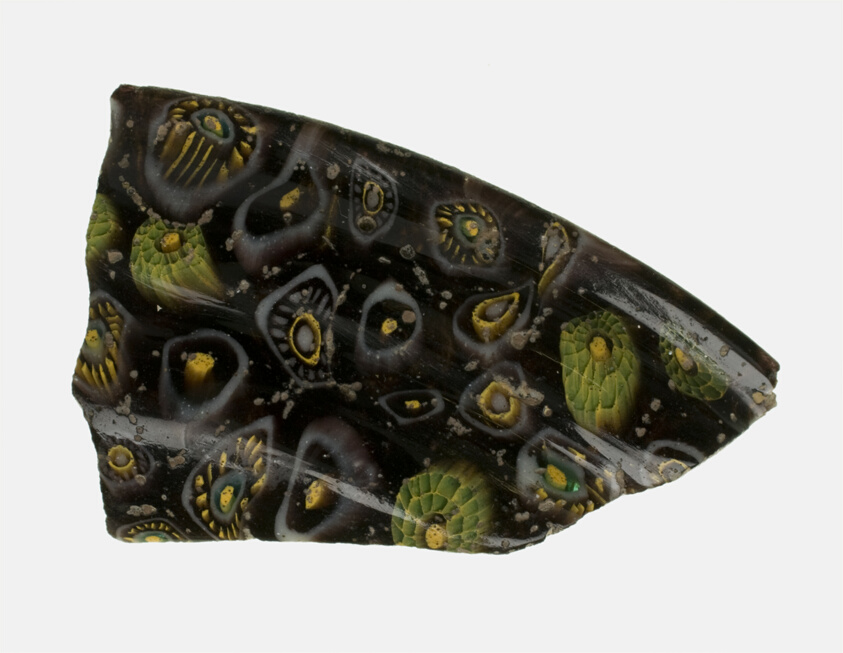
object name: Decorative Arts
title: Fragment of a Cup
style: roman (ancient, style or period), ancient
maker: Roman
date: 1st century BCE–1st century CE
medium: Glass, mosaic glass technique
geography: Italy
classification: fragment; decorative arts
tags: decoration